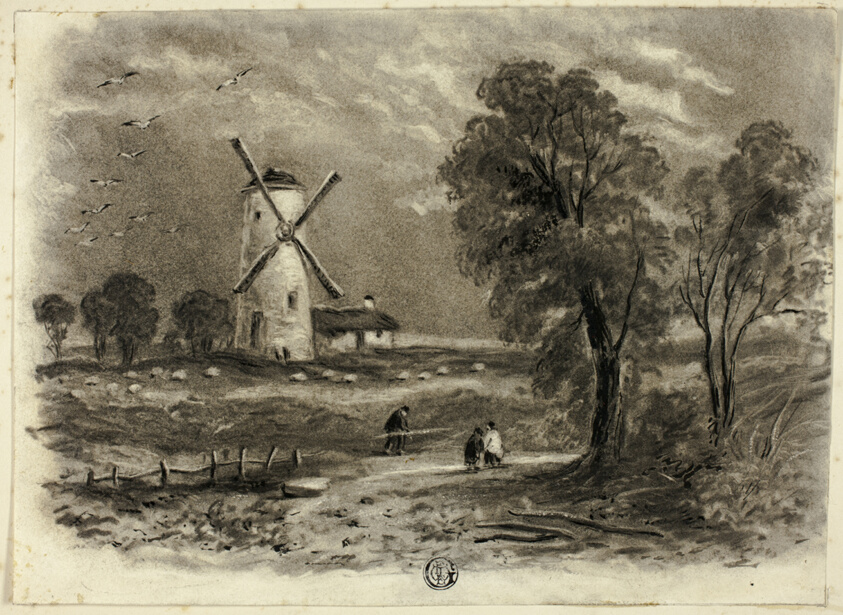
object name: Drawing and Watercolor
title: Landscape with Windmill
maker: Elizabeth Murray (English, c. 1815-1882)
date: September 1850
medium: Charcoal and stumping and scraping with brush and black ink on ivory wove paper tipped onto board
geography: England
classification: charcoal; drawings (visual works); prints and drawing